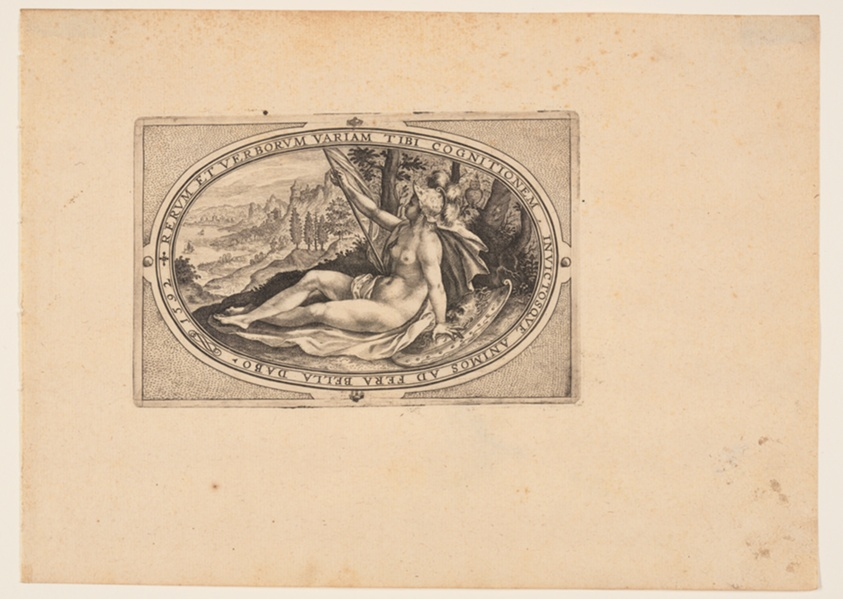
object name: Print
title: Minerva, from Gods and Goddesses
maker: Crispijn van de Passe I; Dutch, c. 1565–1637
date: 1592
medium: Engraving on paper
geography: Netherlands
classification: engraving; paper; print; prints and drawing